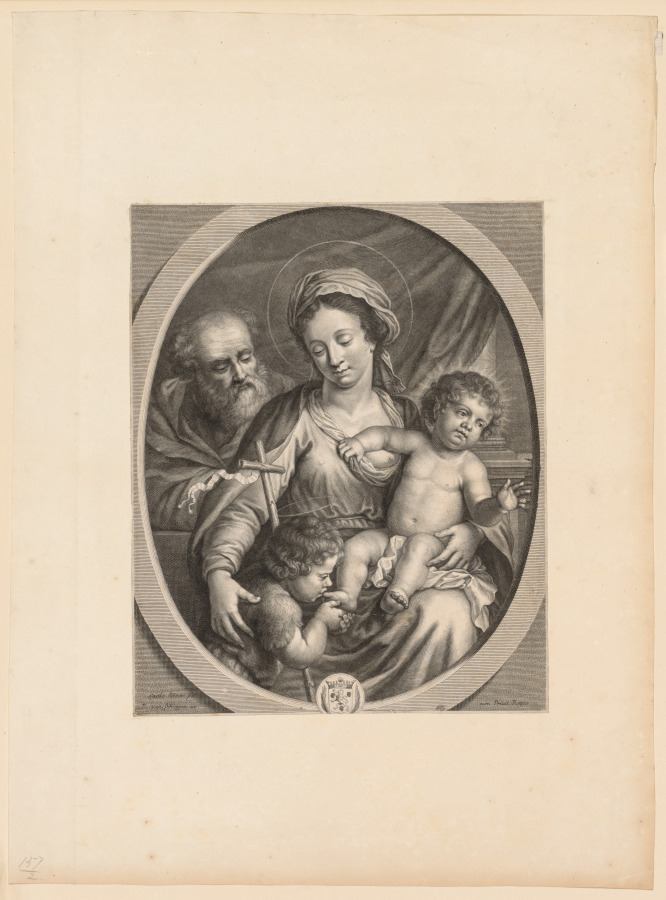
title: Holy Family and S. John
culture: Flanders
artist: Pierre Louis van Schuppen (Flemish, 1627–1702)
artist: after Guido Reni (Italian, 1575–1642)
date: 1650–1700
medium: engraving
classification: Print